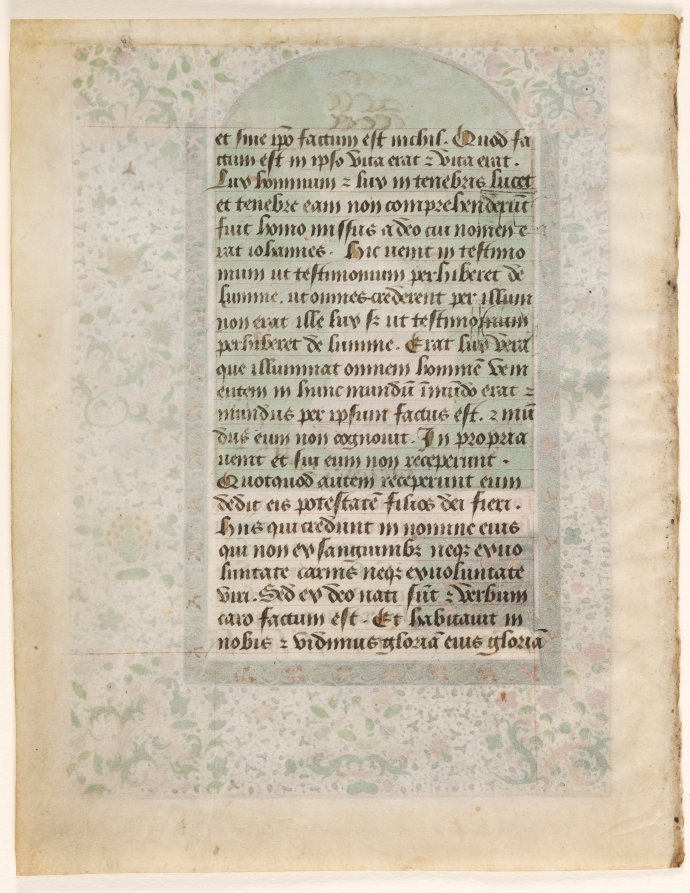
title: Leaf from a Book of Hours: John on Patmos (1 of 2 Excised Leaves)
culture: France, Eastern France or Paris (?), 15th century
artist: Master of Jacques de Luxembourg (French)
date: c. 1465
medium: ink, tempera and gold on vellum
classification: Manuscript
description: The miniature of St. John comes from a cycle of evangelist portraits forming the lessons following the calendar. The Evangelist John is shown seated on the Island of Patmos, to which he was banished by the Roman Emperor Domitian. It was here, as tradition has it, that John composed his Book of Revelation. A common motif is the inclusion of a mischievous devil who attempts to distract the saint from his sacred work by stealing his ink bottle. The Master of Jacques de Luxembourg had a strong sense of visual detail, particularly in architecture, which he typically combined with a flair for narrative. This points to his origin in eastern France or Flanders, though he may have actually worked in Paris.